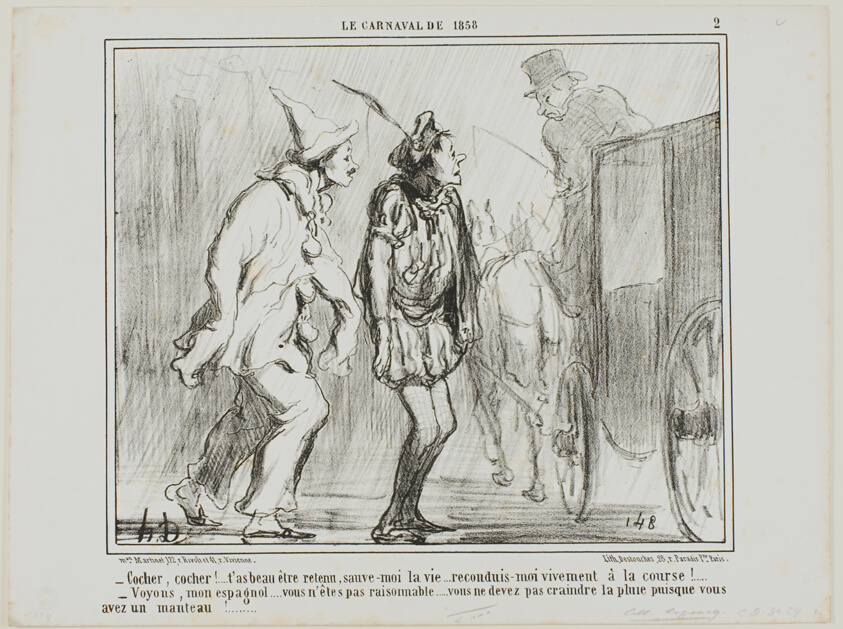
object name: Print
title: “- Driver, driver, you cannot reject me, you have to save my life... bring me back to the races alive! - But come on, Spaniard… be reasonable… you don't have to fear the rain, since you are wearing a coat!…,” plate 2 from Le Carnaval De 1858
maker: Honoré Victorin Daumier; French, 1808-1879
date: 1858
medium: Lithograph in black on white wove paper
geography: France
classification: lithograph; print; prints and drawing